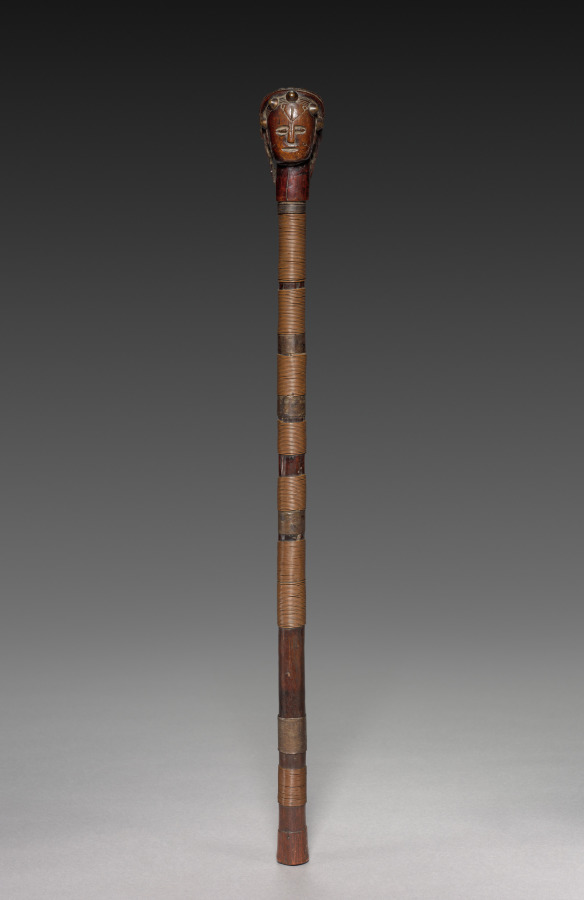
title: Scepter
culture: Africa, Central Africa, Angola, Ovimbundu-style maker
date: late 1800s or early 1900s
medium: Wood, copper alloy, upholstery studs, iron alloy, and cotton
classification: Implements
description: Staffs and scepters as well as tobacco pipes and mortars are among the most important sculptural creations to stem from the Ovimbundu peoples, a Central African culture. All of these object types have associations with ideas of class, status, and power. This scepter has a handle wrapped in thin copper wire that forms wide bands of alternating metal and wooden passages. Its finial is a human head whose carved headdress or hairstyle is ornamented with round-headed metal tacks.